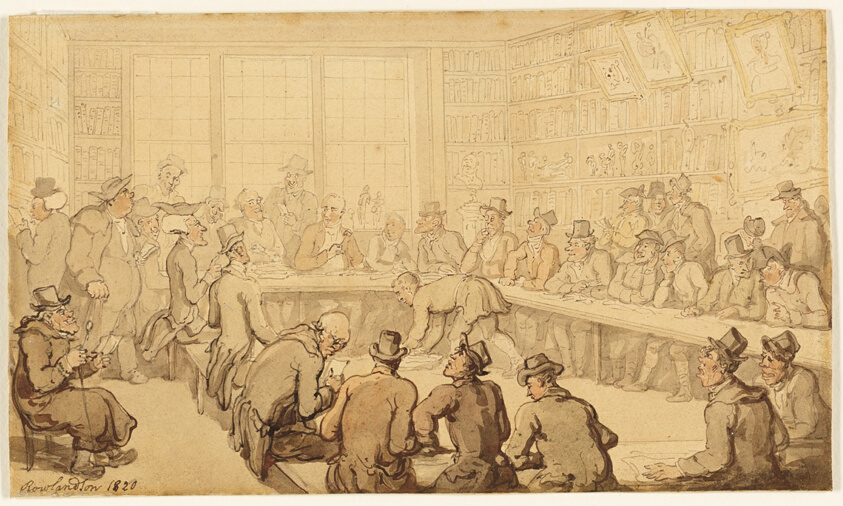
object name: Drawing and Watercolor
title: Study for Dr. Syntax at a Book Auction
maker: Thomas Rowlandson (English, 1756-1827)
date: 1820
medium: Pen and brown and gray ink with brush and watercolor, on tan wove paper, laid down on card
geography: England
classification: watercolor; drawings (visual works); prints and drawing